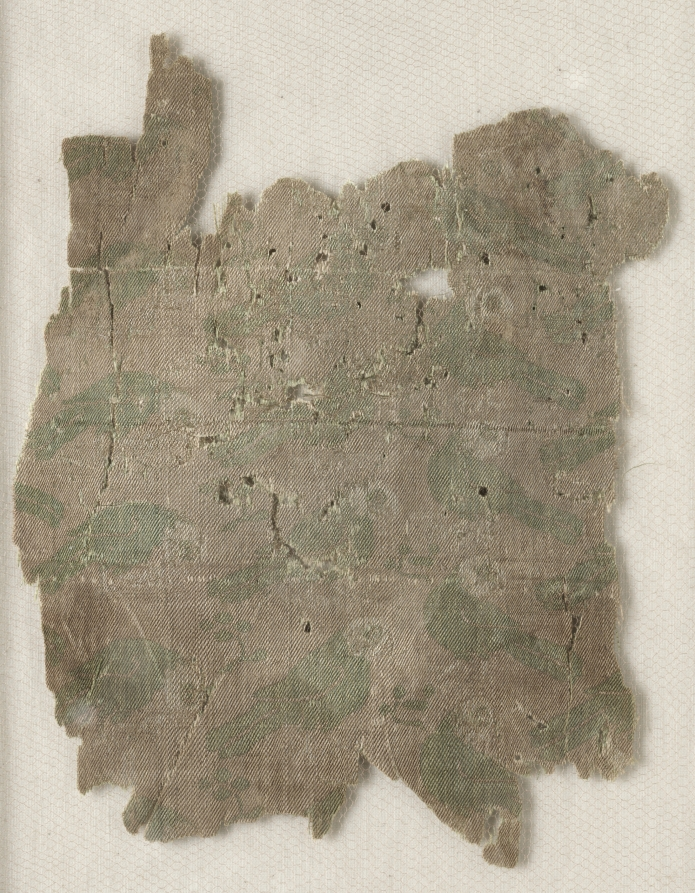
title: Silk Fragment with Aligned Parrots, Part of a Tunic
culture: Syria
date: 400s CE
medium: silk: compound twill weave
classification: Textile